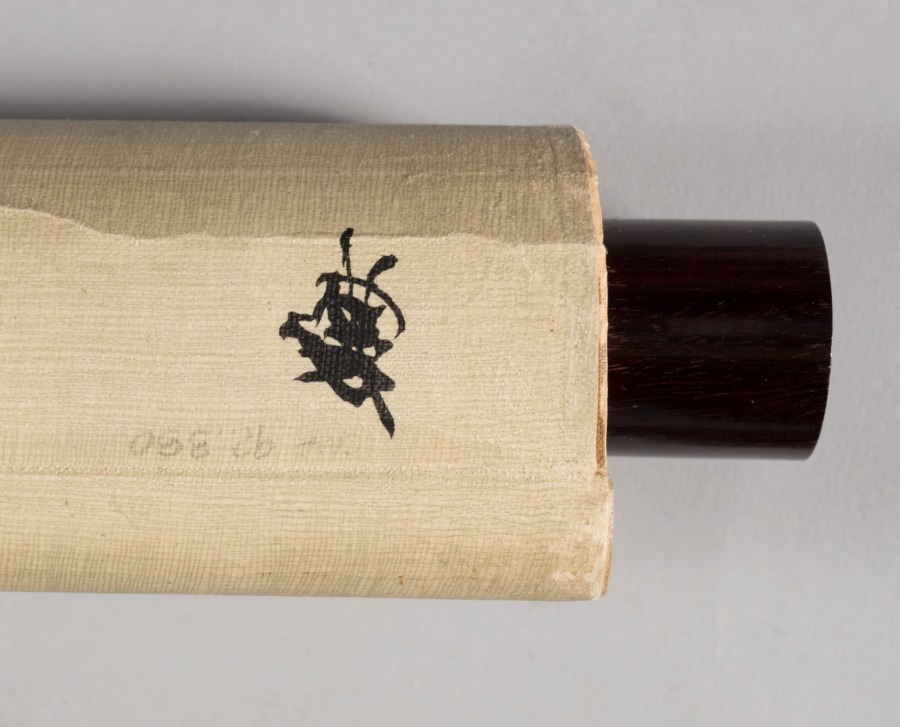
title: Summer Flowers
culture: Japan, Edo period (1615–1868)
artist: Kitagawa Sōsetsu (Japanese, active 1639–50)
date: mid-1600s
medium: hanging scroll; ink, color, and gold on paper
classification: Painting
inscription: 法橋相説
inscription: Seal: 印年 (Inen)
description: White hydrangea, orange-colored demon’s lantern, and greenbrier vine appear together in this scroll. The artist used the dripping-in (tarashikomi) technique to create a sense of depth and dimension in the leaves of the plants. A carefully controlled brush loaded with a high ratio of water to ink or color is key to the success of this brush method. Gold lines indicate the veins of leaves and the seams of pods.